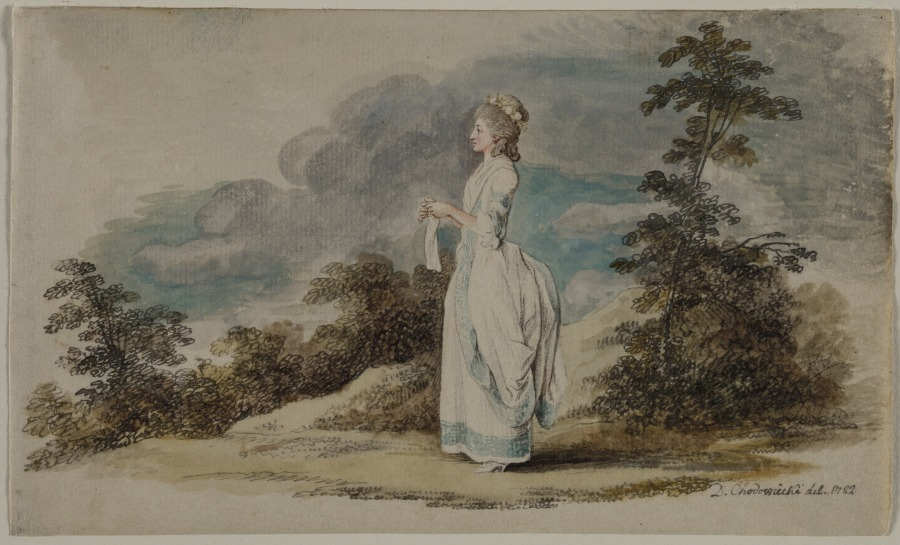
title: Susanne (The Artist's Daughter at the Age of Twenty-One)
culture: Germany, 18th century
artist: Daniel Chodowiecki (German, 1726–1801)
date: 1782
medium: pen and black ink, watercolor and gouache over graphite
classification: Drawing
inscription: signed, lower right, in gray wash: D. Chodowiecki del. 1782 ; VERSO, lower left, in graphite: 6. (sideways)